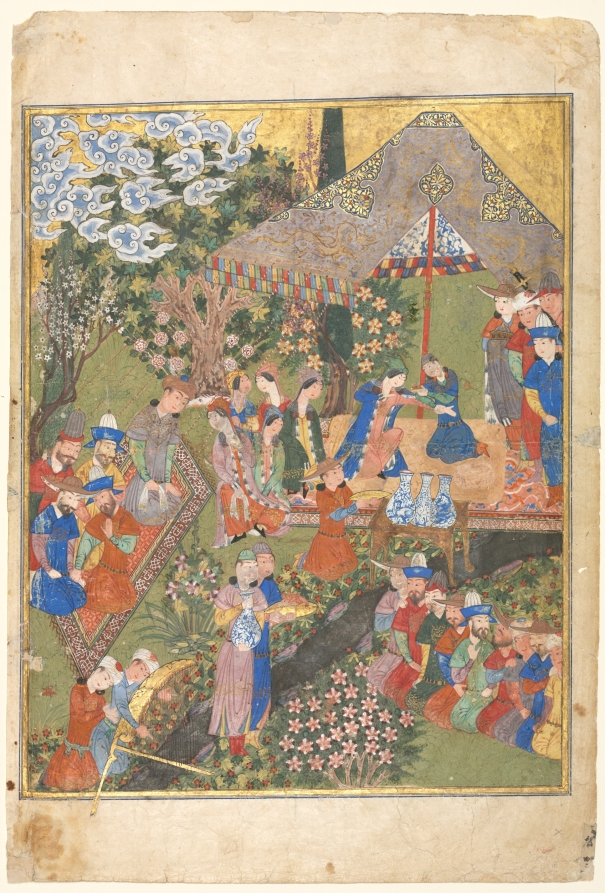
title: Royal Reception in a Landscape, right folio from the double frontispiece of a Shahnama (Book of Kings) of Firdausi (Persian, about 940–1019 or 1025) (verso)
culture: Iran, Shiraz, Timurid period (1370-1501)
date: 1444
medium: opaque watercolor, gold, and silver on paper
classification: Manuscript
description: The painting on the verso of this folio is the first half of a double-page frontispiece now detached from a Shah-nama manuscript (see CMA 1956.10 for the second half of the frontispiece). The scene does not illustrate a narrative from the Shah-nama, but is likely a representation of the courtly audience for whose entertainment the manuscript was created. The date and style of the painting indicate that it was made during the reign of the Timurid dynasty in Shiraz, Iran.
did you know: A musician plays a harp that has been mounted over a stream, painted with now tarnished silver paint.